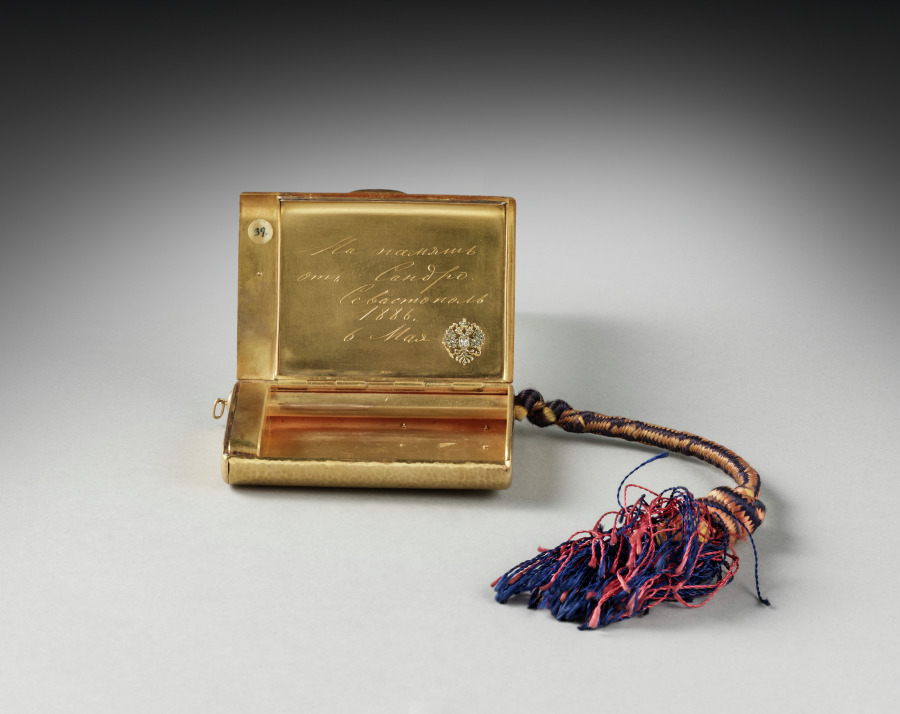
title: Cigarette Case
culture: Russia, St. Petersburg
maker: attributed to House of Fabergé (Russian, 1842–1918)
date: 1886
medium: gold, enamel, diamonds, silk cord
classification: Miscellaneous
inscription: inscribed: In Rembrance/from Sandro/Sevastopol/1886/6 May in Cyrillic script.